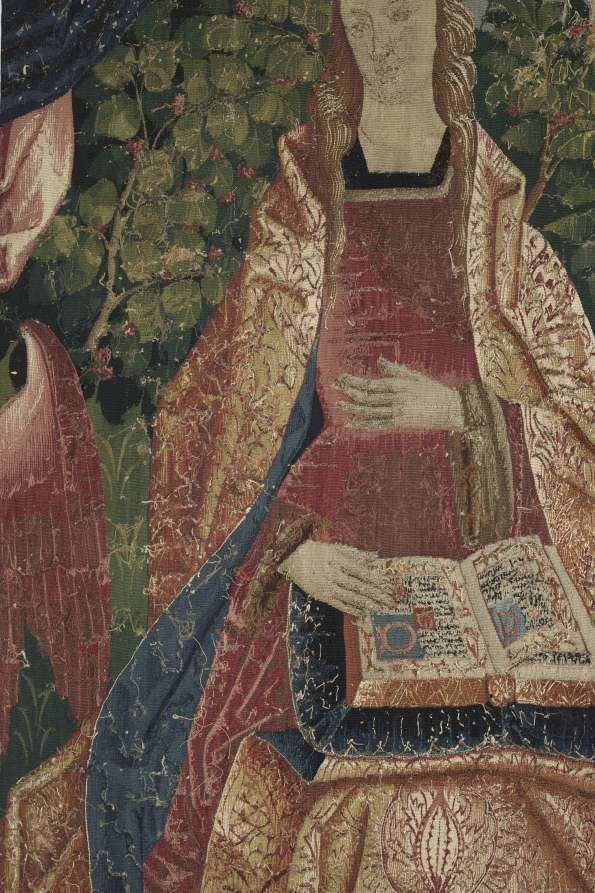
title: The Triumph of Eternity (from Chateau de Chaumont set)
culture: France, Lyon(?), early 16th century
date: 1512–15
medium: silk and wool; tapestry weave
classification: Tapestry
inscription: French verse in Gothic letters translates as follows: "Nothing triumphs by right authority, Unless it be conducted by Eternity. Nothing is permanent beneath the firmament, But above us triumphs Eternity."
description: The Triumph of Eternity is represented by the Coronation of the Virgin. Dressed in crimson velvet with an opulent brocaded velvet shawl, the Virgin is seated in the center as two angels hold a crown over her head. Five musical angels surround her playing an organ, recorder, straight cornetto, harp, and lute, while another sings from an open music book. The scenes in the set display a conservative style in which the figures are placed in shallow landscapes, thereby ignoring pictorial innovations for depicting space and mass. The verse in Old French at the top states: Nothing triumphing by due authority Remains permanent and durable. Nothing is permanent under the heavens, But above, eternity triumphs.